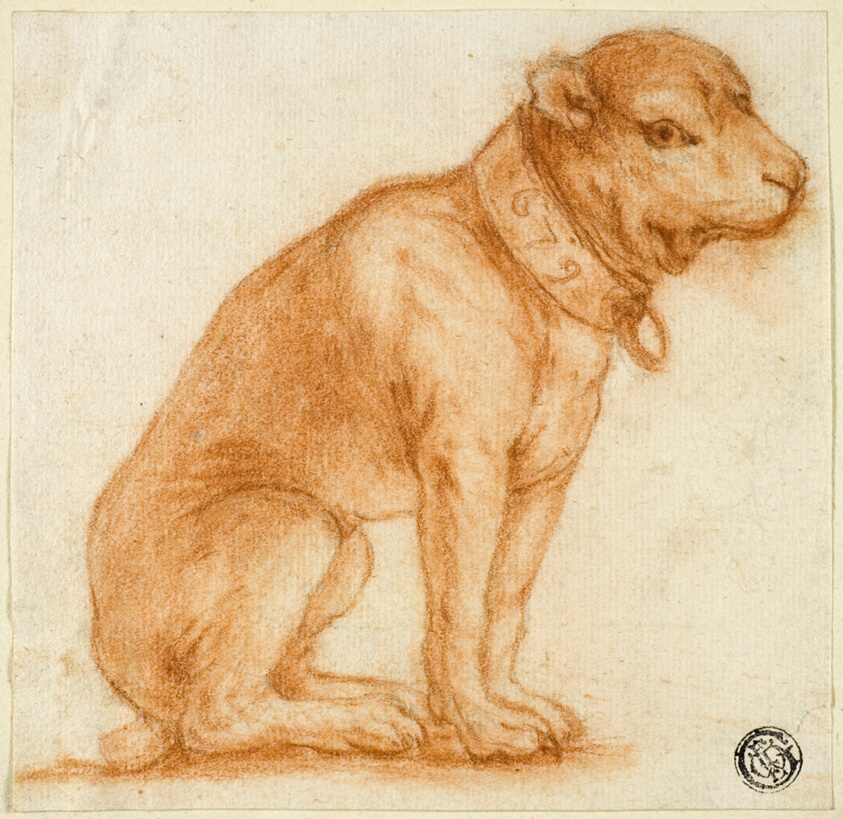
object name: Drawing and Watercolor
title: Seated Dog with Collar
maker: Attributed to Dirk Valkenburg; Dutch, 1675-1721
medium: Red chalk with stumping, over black chalk, on ivory laid paper, tipped onto cream wove paper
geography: Holland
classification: chalk; drawings (visual works); prints and drawing